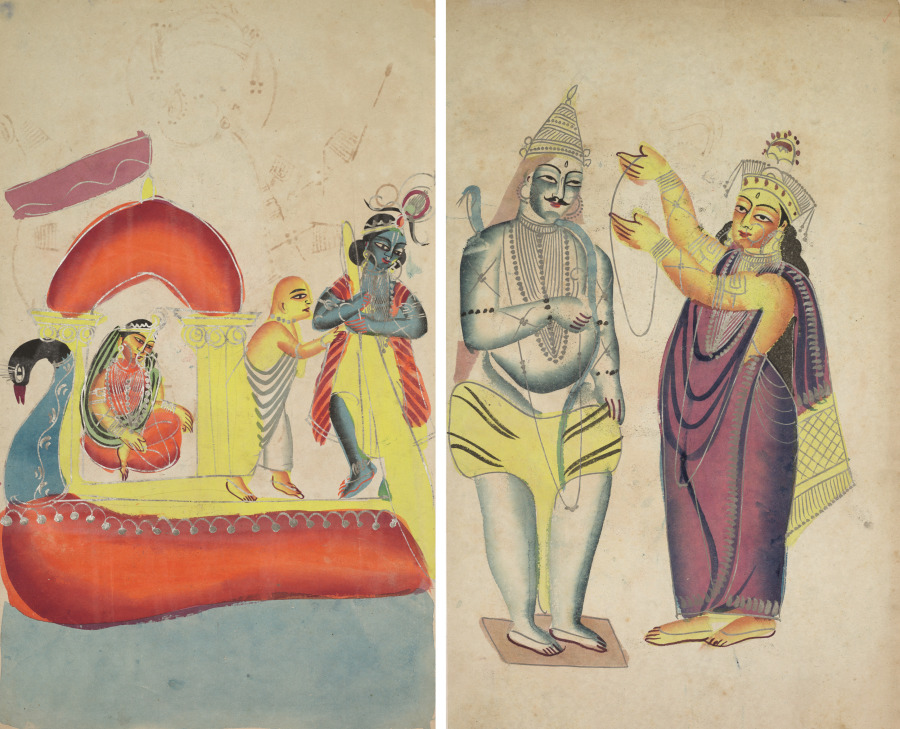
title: Krishna Ferrying Radha Across the Yamuna River (recto); Parivati Placing a Wedding Garland on Shiva (verso)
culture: Eastern India, Bengal, Kolkata, Kalighat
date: c. 1890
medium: Gum tempera, graphite, ink, and tin on paper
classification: Painting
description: This image is taken from popular dramas where Krishna, lover of the cowgirls (gopis), disguises himself as a boatman to ferry a demure Radha, his favorite gopi. It depicts devotion and the intensity of separated lovers.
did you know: Krishna has a Prince Albert hairstyle.